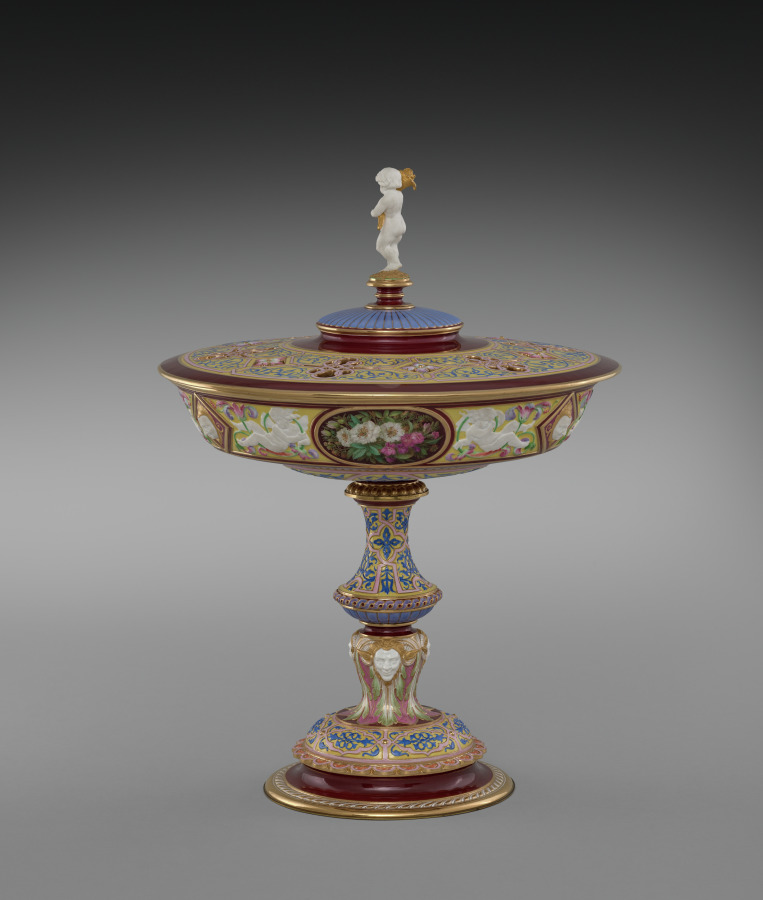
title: Standing Cup and Cover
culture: France, Sèvres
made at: Sèvres Porcelain Factory (French, est. 1756)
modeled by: Hyacinthe-Jean Regnier (French, 1803–1870)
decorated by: Francois-Hubert Barbin (French, 1786-)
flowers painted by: Jacques-Nicolas Sinsson (French)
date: 1844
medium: porcelain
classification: Ceramic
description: The official French porcelain factory at Sèvres has always been one of Europe's most important ceramic manufacturers, famous for its decorative pieces as well as more utilitarian wares. This vase in the Renaissance style, its design inspired by 16th-century French examples, is clearly in the tradition of elaborately conceived and decorated pieces intended for use by the French court or as presentation pieces by its monarchs. The latter was the fate of this Covered Cup, acquired in 1846 by Queen Marie-Amélie d'Orleans, the wife of Louis-Philippe, king during the July Monarchy (1830-48). Soon thereafter the vase was presented to a now unknown person. It is one of four pieces of this design made at the Sèvres factory, and the only one known today to have survived.